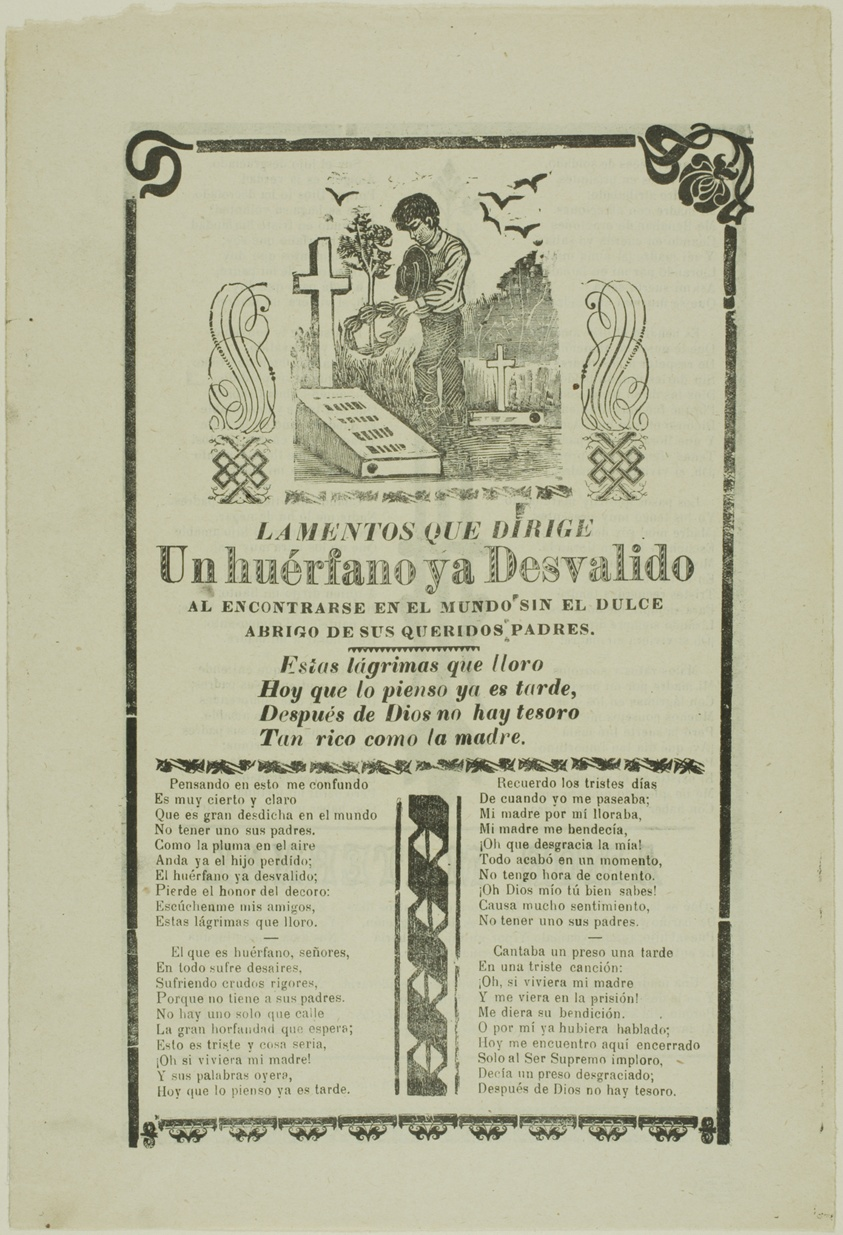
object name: Print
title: Laments of a Helpless Orphan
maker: Manuel Manilla (Mexican, 1830-c.1900)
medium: Relief print on paper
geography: Mexico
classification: relief etching; print; prints and drawing